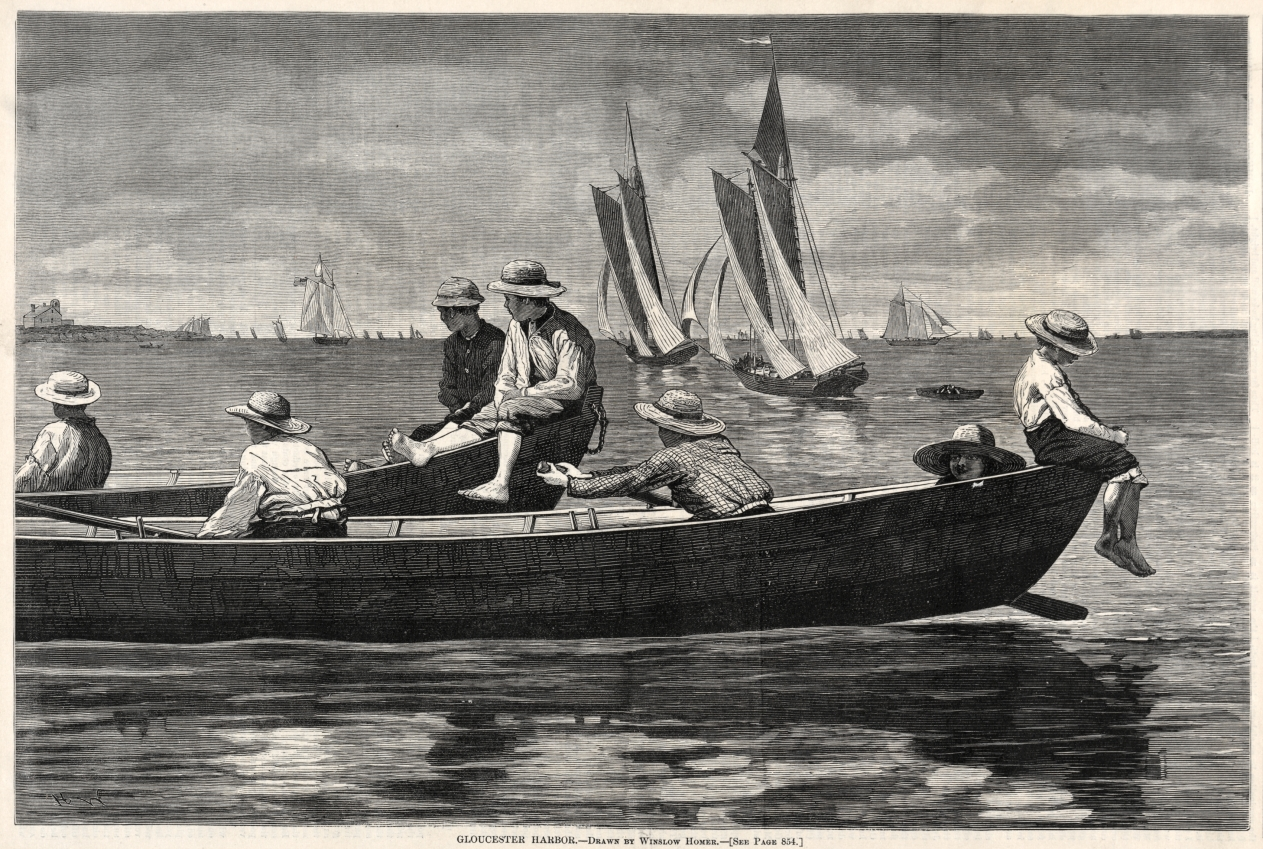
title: Gloucester Harbor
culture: America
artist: Winslow Homer (American, 1836–1910)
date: 1873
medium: wood engraving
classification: Print